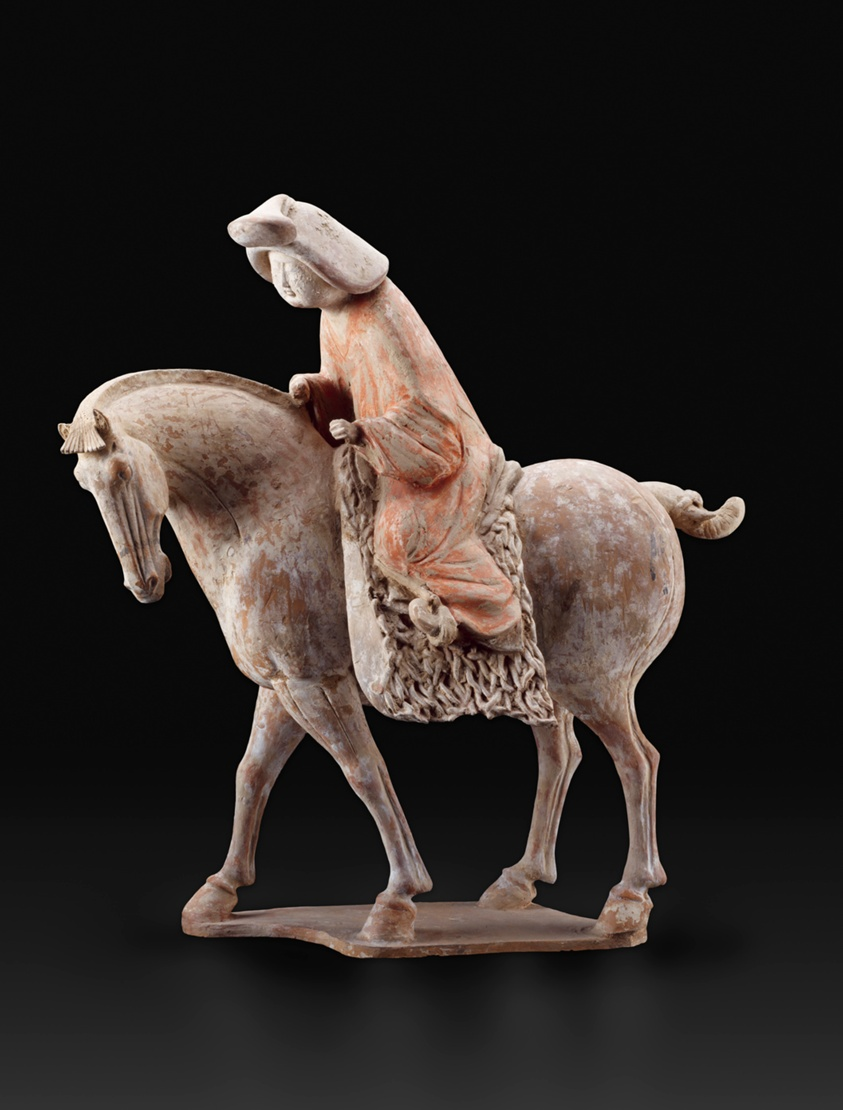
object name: Sculpture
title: Equestrienne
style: Chinese (culture or style), tang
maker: China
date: Tang dynasty (618–907), mid-8th century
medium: Earthenware with polychrome pigments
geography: China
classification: earthenware; asian art; ceramics; sculpture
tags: horses, women, equestrienne, orange (color), red (color), animals